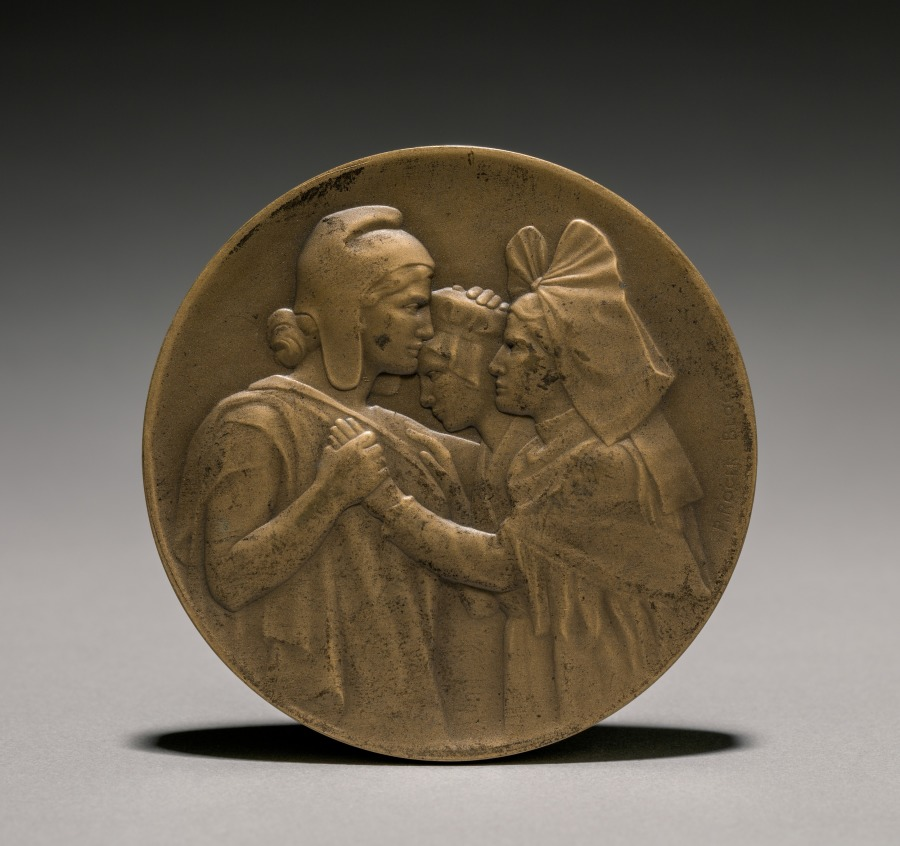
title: Medal (obverse)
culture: France, 20th century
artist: Paul Roger-Bloche (French)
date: 1900s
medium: bronze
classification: Metalwork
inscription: "Retour del 'Alsace et de la Lorraine à la France. 11 Novembre 1918."